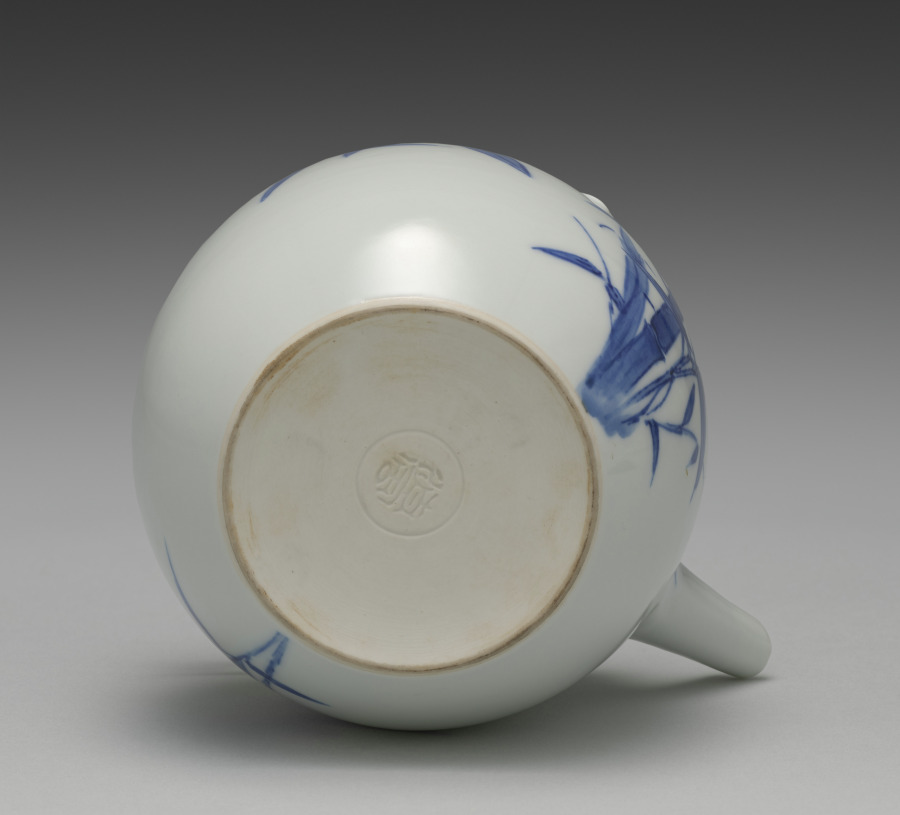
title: Teapot with Bamboo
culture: Japan, Taishō period (1912–26)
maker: Seifū Yohei IV (Japanese, 1872–1951)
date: 1914–46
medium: Porcelain with underglaze blue, molded decoration and metal handle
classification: Ceramic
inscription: 清風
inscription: 清風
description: This teapot has a well-balanced design of bamboo in underglaze blue and nyoi staff-head motifs applied to both sides at the shoulder.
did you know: There is a seal on the base of the teapot.